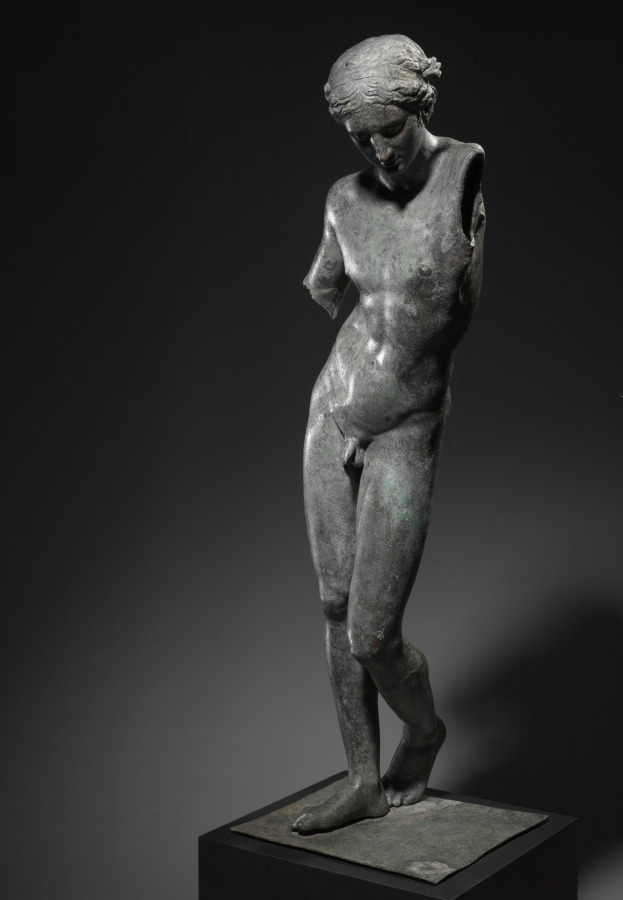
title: The Cleveland Apollo: Apollo Sauroktonos (Lizard-Slayer) or Apollo the Python-Slayer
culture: Greece, Athens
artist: attributed to Praxiteles (Greek, Athenian, c. 400–330 BCE)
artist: or Follower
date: c. 350–200 BCE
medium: bronze, copper and stone inlay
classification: Sculpture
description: The Cleveland Apollo was cast in multiple sections using the indirect lost-wax technique. First, molds were taken from a working model (now no longer known or preserved), which was then reproduced in hollow wax sections, each filled with a clay core. After details were added to the wax models, each was encased in clay. Then, the wax was heated, melted out, and replaced by molten bronze. Once cooled, the hollow bronze sections were fused together and finished, patching flaws and adding inlays and other details. Since the initial model was retained, it could be reused, allowing ancient sculptors to create multiples and variations of favorite works. Thus, remarkably, the Cleveland Apollo may once have been one of several such works. The consistently thin walls of the Cleveland Apollo (mostly 5-6 mm thick), together with the nearly invisible joins between most cast sections, show that it was created by highly skilled sculptors and foundry workers. Close looking reveals several noteworthy features. First, ovals atop the right foot mark a fusion weld, where molten bronze pooled to join separately cast sections. Second, small rectangular bronze patches cover parts of the surface (especially the right hip), each carefully cut and then hammered into place over holes or other casting defects. Inlaid lips, nipples, and eyes (the right ancient stone, the left now a modern replacement) added to the lifelike appearance of the sculpture, contrasting with the once bronze-colored skin. Finally, radiography helps to illuminate hidden features, such as the cast edge of the neck of Apollo.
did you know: Ovals across the top of the right foot show a clear join between separately cast sections.